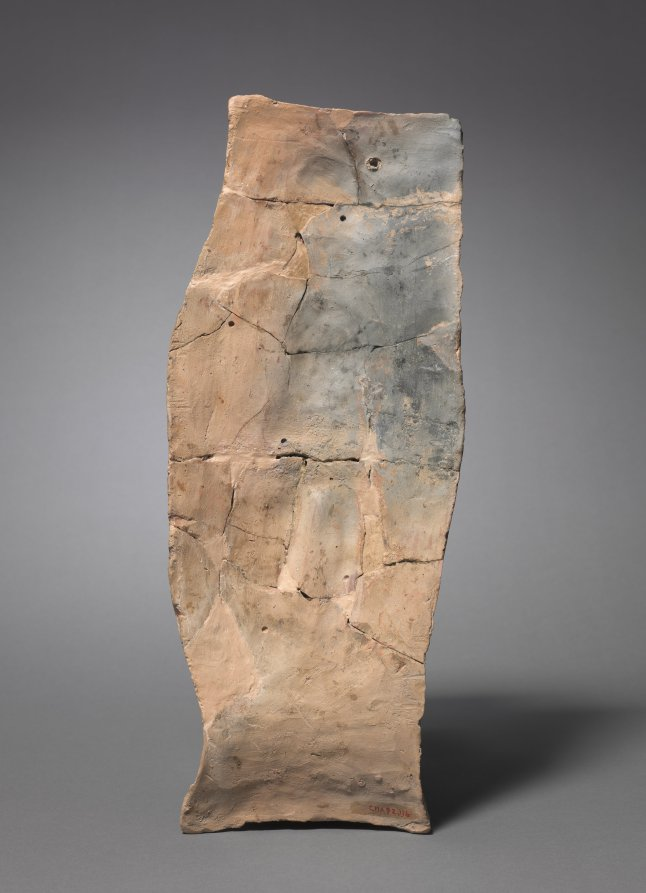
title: Male Figure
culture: India, Bengal, Chandraketugarh area, Shunga period (185–78 BCE)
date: c. 100 BCE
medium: Molded terracotta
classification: Sculpture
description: This idealized male figure appears to be the epitome of wealth and success—the attributes sought by a faithful devotee who performs regular worship at a sacred site. The bulbous turban with finely incised textile patterning is characteristic of the style from this period, as are the pinched facial features and the hem of the lower garment that swirls out around the legs.